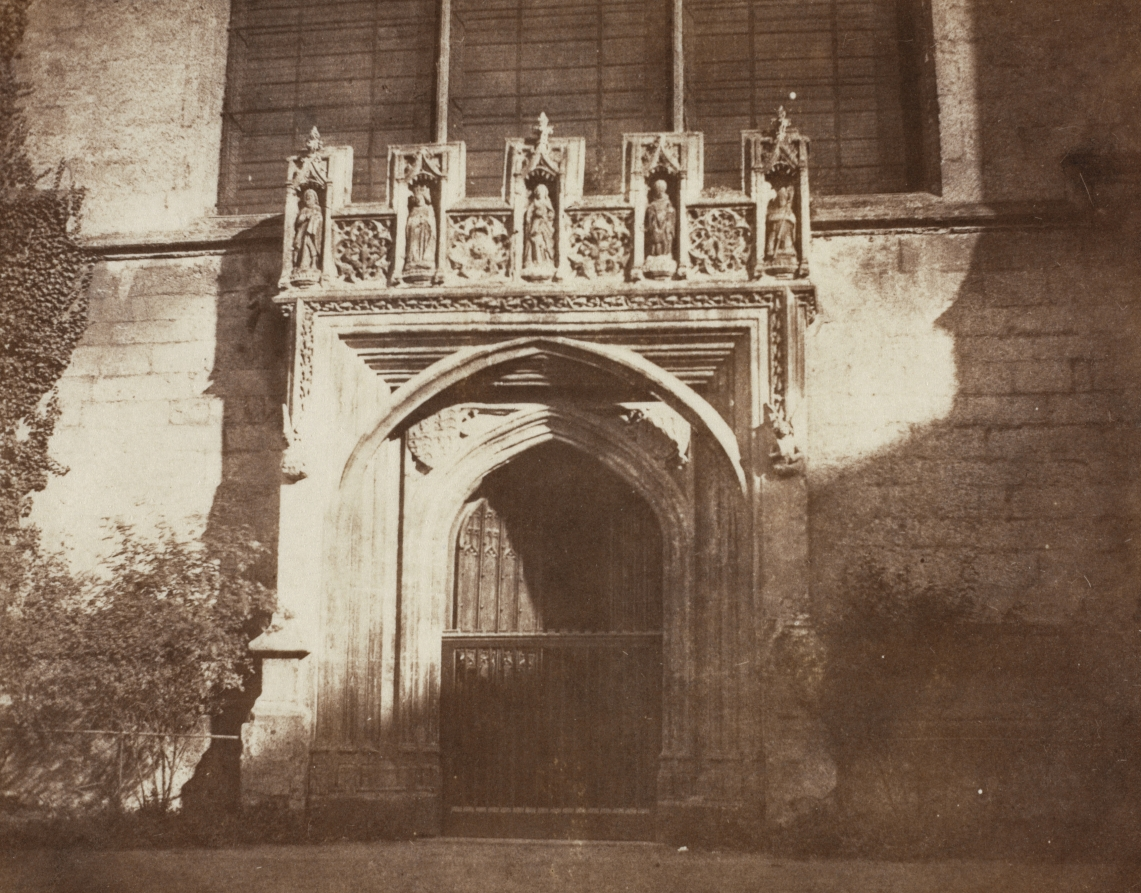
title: Ancient Door, Magdalen College, Oxford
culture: England, 19th century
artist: William Henry Fox Talbot (British, 1800–1877)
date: 1843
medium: salted paper print from calotype negative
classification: Photograph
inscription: Written in ink on verso: "LA 129"